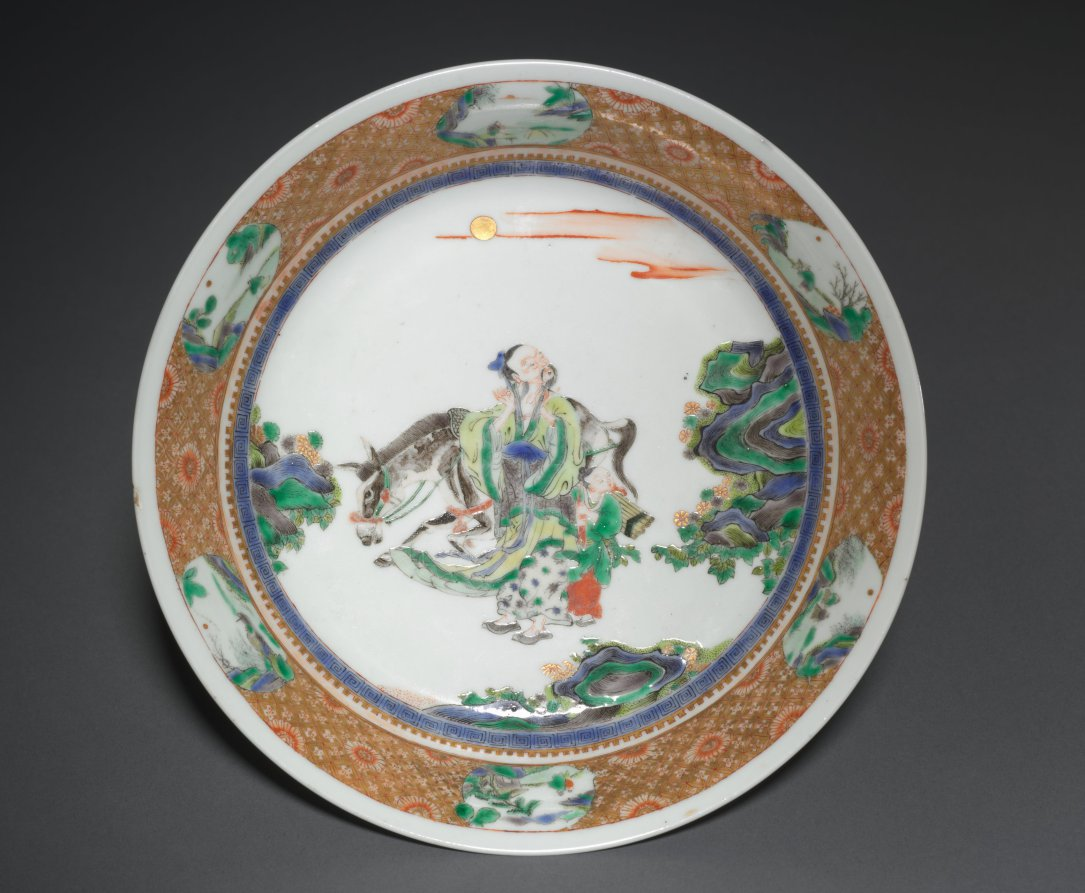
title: Dish with Zhang Guolao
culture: China, Jiangxi province, Jingdezhen kilns, Qing dynasty (1644-1911), Kangxi reign (1662-1722)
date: 1662–1722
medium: porcelain with famille verte overglaze enamel and painted gold decoration (interior) and powder blue glaze with painted decoration (exterior)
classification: Ceramic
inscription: 大清康熙年製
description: Zhang Guolao, featured on this dish, is one of the Eight Immortals and a gifted magician who was believed to know the secret arts to obtain longevity. Typically depicted as an old man and accompanied by his mule, he is the patron saint of artists. His mule is said to be magical; it can be folded up like a piece of paper to fit into a small bag. The central scene is framed by a sumptuously gold-decorated rim showing spaces reserved for landscape scenes in primarily fresh blue and green colors.